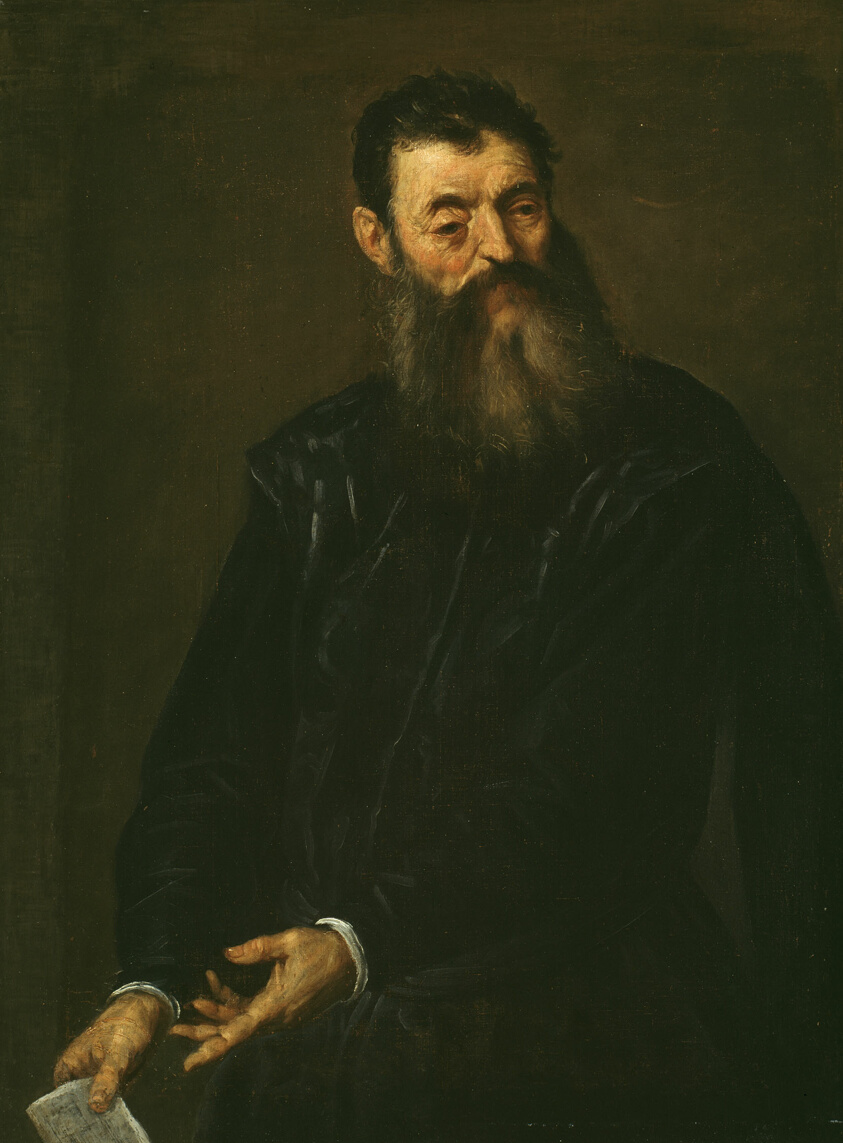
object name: Painting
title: Portrait of a Gentleman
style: 16th Century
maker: Palma Giovane (Jacopo Palma; Italian, c. 1548–1628)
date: c. 1590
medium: Oil on canvas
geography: Italy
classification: oil on canvas; Italian; oil paintings (visual works); paint; painting; european painting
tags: portraits: male subject, bearded man, letters (correspondence), man, portrait